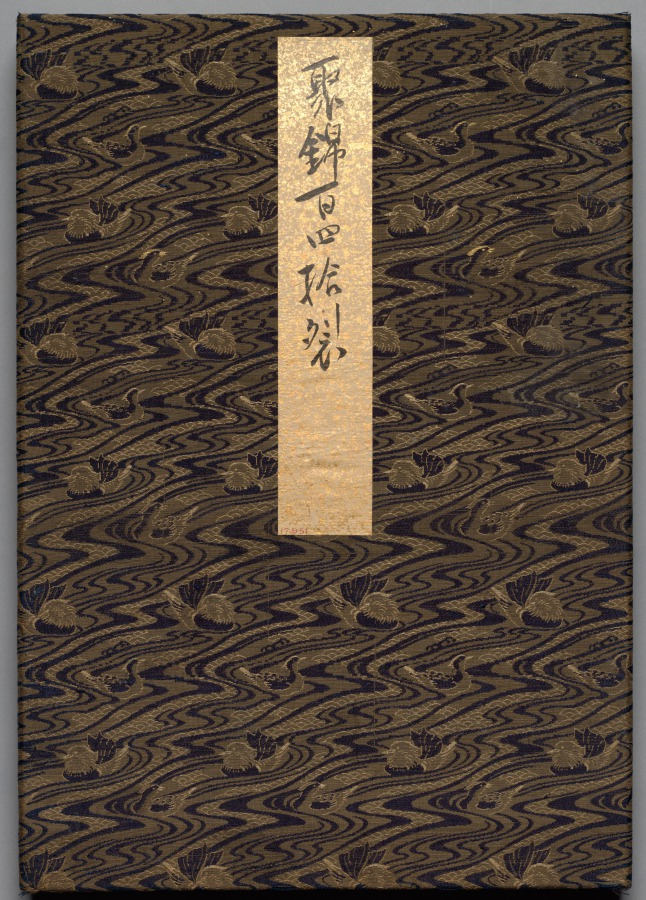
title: Album of Textile Samples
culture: Japan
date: 1790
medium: silk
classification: Textile